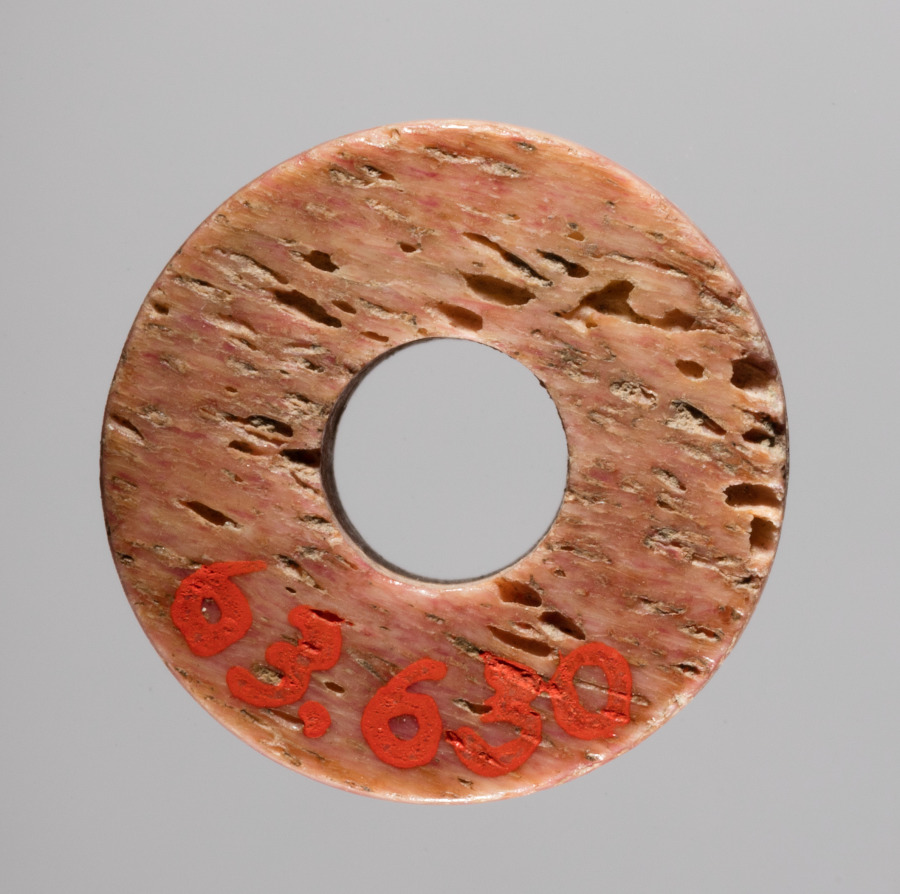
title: Spindle Whorl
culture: Iran, early Islamic period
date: 700s - 900s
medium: bone, incised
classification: Spindle Whorl